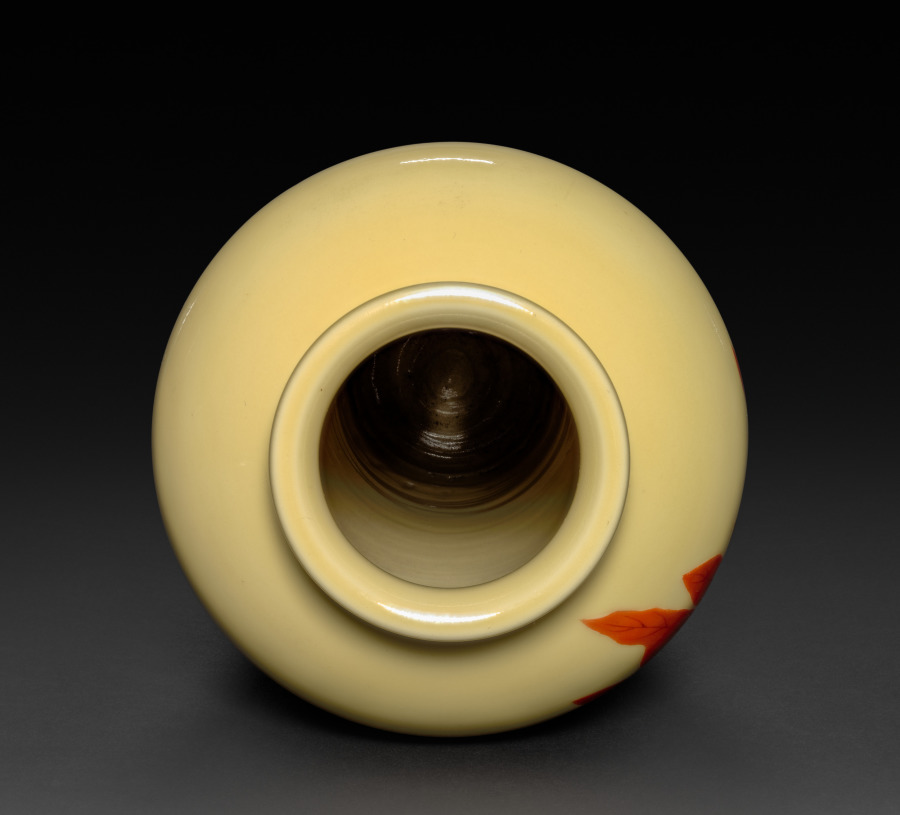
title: Prunus Vase with Amaranth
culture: Japan, Taishō period (1912–26)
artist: Seifū Yohei IV (Japanese, 1872–1951)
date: 1914–46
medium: Porcelain with yellow glaze and overglaze color enamel and gold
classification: Ceramic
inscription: 清風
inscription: 渡邊所藏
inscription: 清風造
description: Yohei IV’s interest in bold, colorful designs is on full display in this vase shaped like a “prunus vase,” or meiping (Japanese meipin). It has two colors of amaranthus on a yellow ground. It follows a design appearing on a sleeve-shaped vase by Yohei III. Yohei IV uses bright spring-green dots of overglaze enamel to suggest a ground plane in his yellow environment; he also uses red and magenta accented with wild gold cascades of dots for two plants he places on opposite sides of the vase, one much larger than the other. In Yohei III’s version, the body of the vessel is white, and the foliage of one plant is red with carefully painted veins in gold, while another plant strategically positioned behind it has a deep rust color, again carefully detailed in gold. In a sense, Yohei IV has deconstructed his father’s logical, balanced design and re-presented it as an emotive, lightheartedly chaotic one that sates the appetite for instant gratification, much as his father’s creation rewards the pursuit of elegance.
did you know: Seifū Yohei IV continued to create works in the studio’s signature colors but also produced pieces with strong color and flare that were his interpretations of Qing dynasty (1644–1911) glazes.